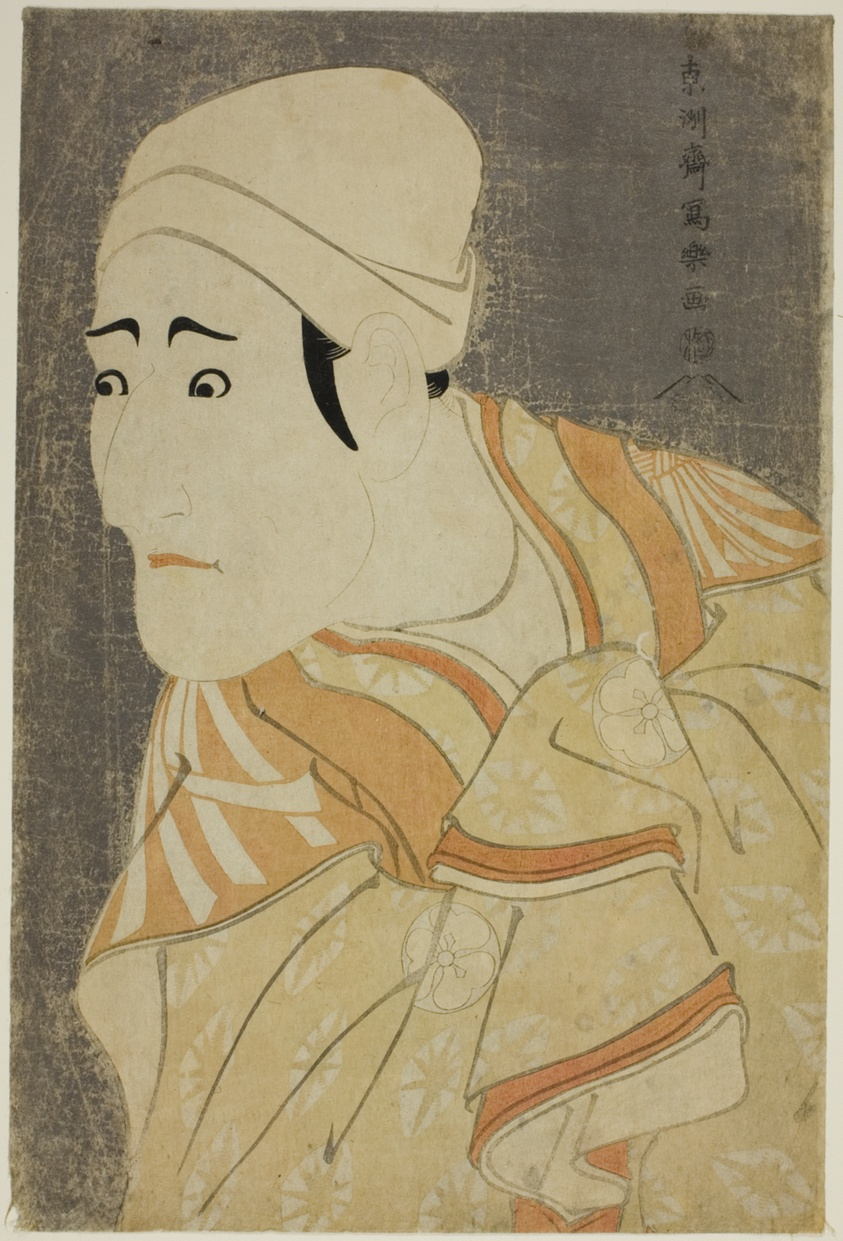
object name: Print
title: The actor Morita Kan'ya VIII as the Palanquin-bearer Uguisu no Jirosaku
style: Japanese (culture or style)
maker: Toshusai Sharaku 東洲斎 写楽; Japanese, active 1794-95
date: 1794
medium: Color woodblock print, oban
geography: Japan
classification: woodblock print; print; asian art